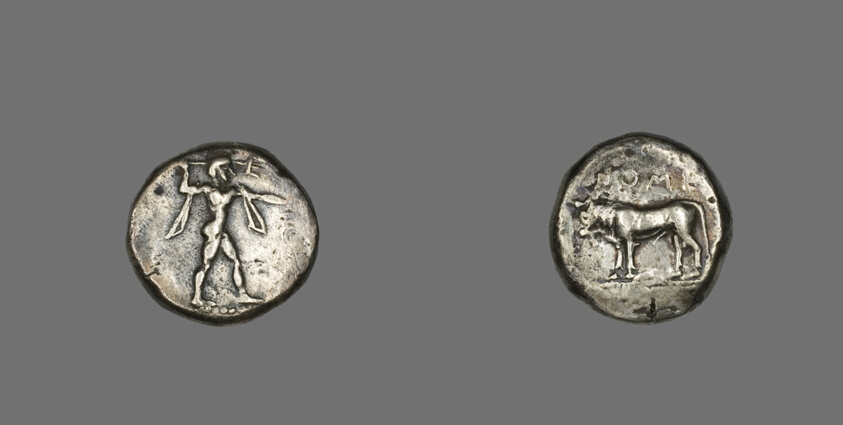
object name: Coin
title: Stater (Coin) Depicting the God Poseidon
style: greek, ancient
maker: Greek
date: 480-400 BCE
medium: Silver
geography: Pesto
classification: coin; ancient art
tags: gods (deities), nudes, bull, deities, mythological figures